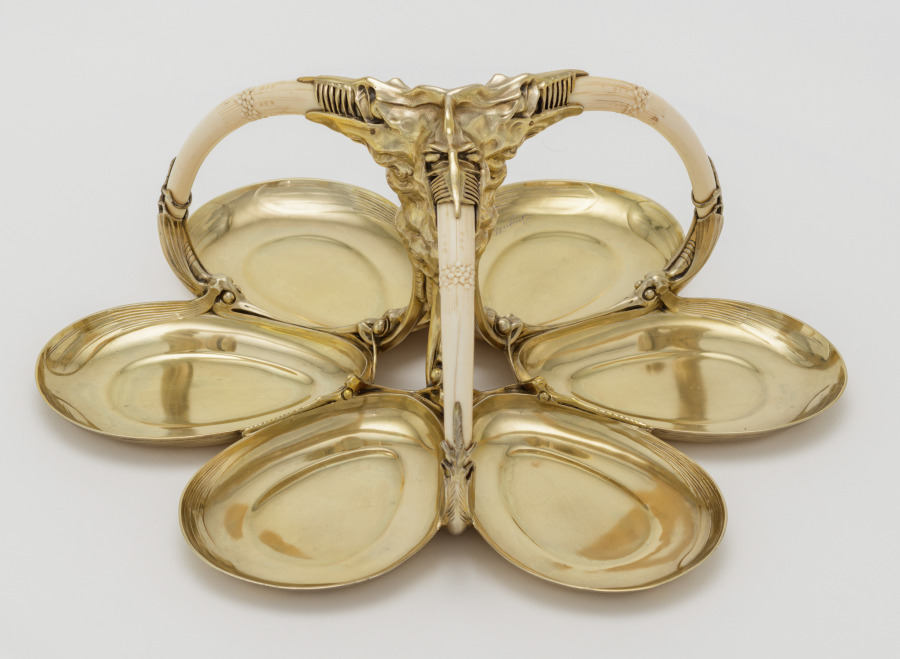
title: Salver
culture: France, Paris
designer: Carlo Bugatti (Italian, 1856–1940)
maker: Adrien-Aurélien Hebrard (French, 1866–1937)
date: c. 1907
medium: Gilt silver and ivory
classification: Silver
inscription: inscribed inside one of six ovoid compartments: "Bugatti" in ligature. Engraved on back: A.A. HEBRAND/ 8 RUE ROYAL/PARIS FRANCE.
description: This tea and coffee service, salver, and table, together with some now missing cups, were all designed by Carlo Bugatti as an ensemble and presented at the 1902 exposition devoted to decorative arts in Turin, Italy. The set was probably acquired from Bugatti's 1907 exhibition at the Galerie Hébrard in Paris by a wealthy South African widow, Anna Blake, who was living there at the time. Some of the animal and insect motifs suggest mythical beasts or the fossils of prehistoric animals. When Mrs. Blake returned to Cape Town, she took these and other pieces designed by Bugatti with her, and they remained in South Africa throughout her lifetime.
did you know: Carlo Bugatti's sons achieved illustrious careers of their own. Rembrandt Bugatti (1884-1916) became a celebrated sculptor, and Ettore Bugatti (1881-1947) manufactured luxurious automobiles and racing cars.